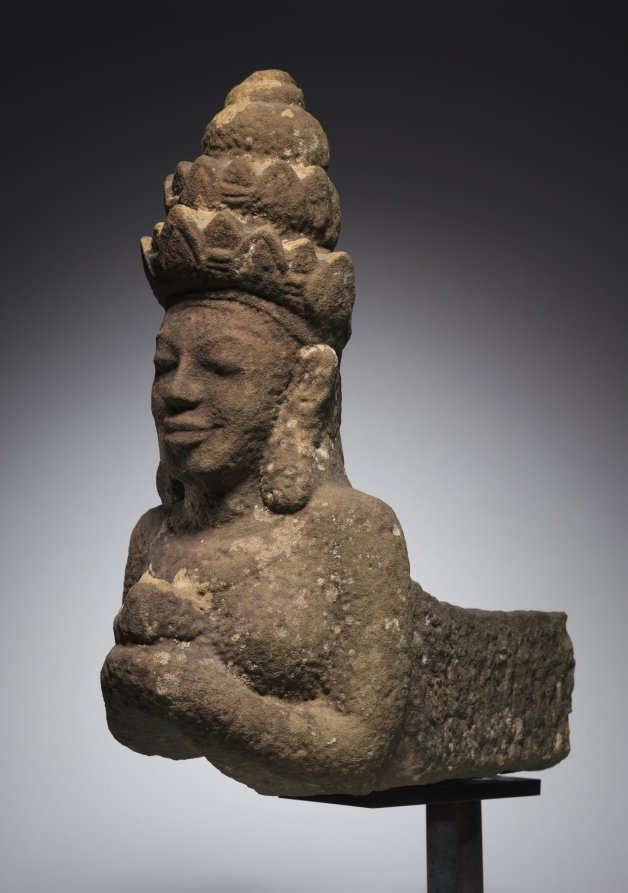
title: Apsara Bracket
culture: Vietnam (Champa)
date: 900s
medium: Sandstone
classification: Sculpture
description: This celestial being is a resident of heaven, ornamented as a goddess with tiered crown, heavy earrings, and broad necklace. She reverently proffers an offering, possibly a lotus bud. This figure would have been part of the embellishment of a Cham temple. Her bust emerges from an architectural element that may have formed the end of a balustrade or ceiling bracket.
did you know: The light-colored spots are due to lichen and other organic growths that have hardened over time, the result of outdoor weathering.